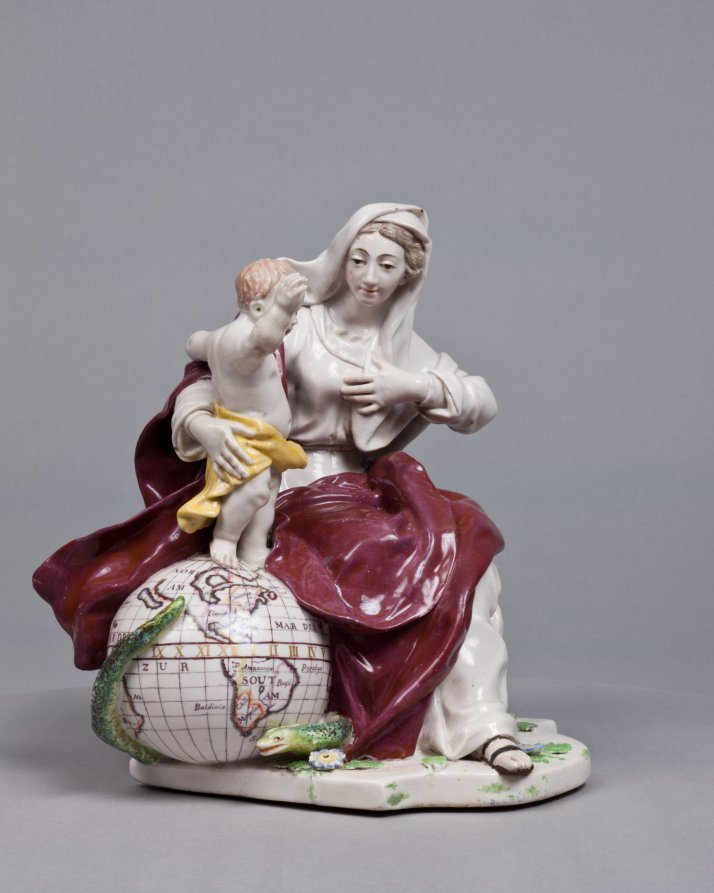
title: Madonna and Child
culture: England, Chelsea, 18th century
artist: Chelsea Porcelain Factory (Britain, London, 1745–84)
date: c. 1755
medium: porcelain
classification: Ceramic